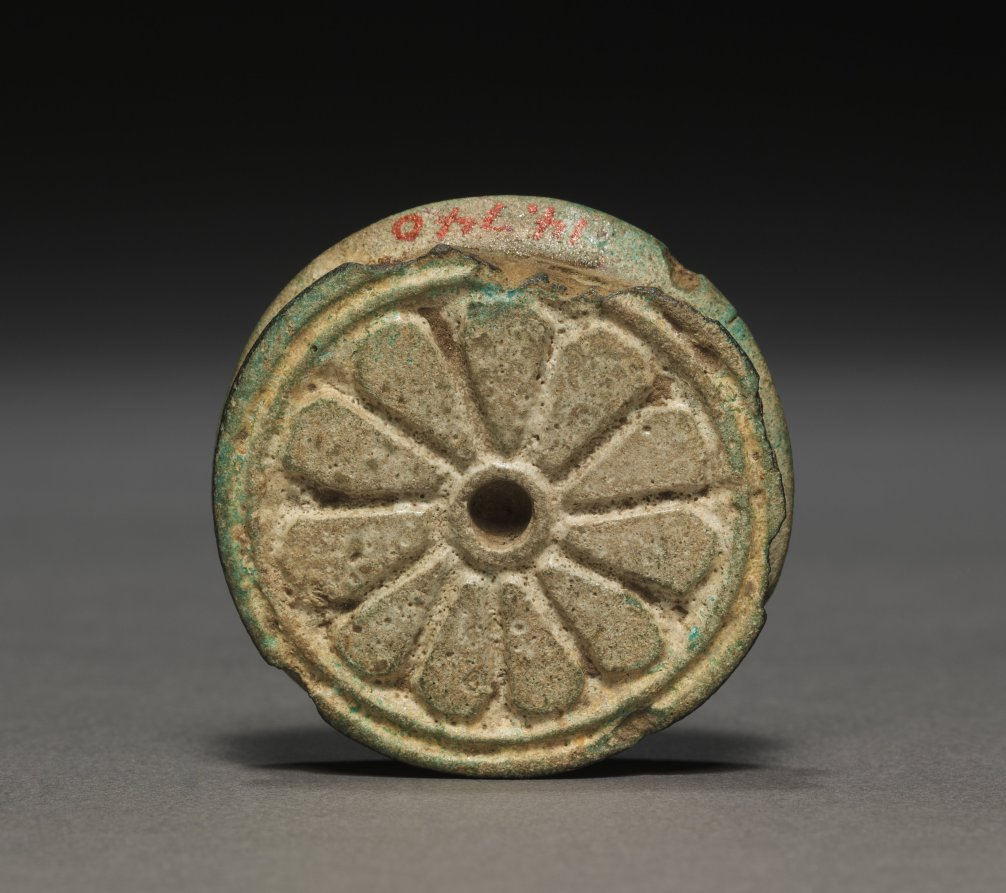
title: Ear Stud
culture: Egypt, New Kingdom (1540–1069 BCE), Dynasty 18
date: 1540–1069 BCE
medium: turquoise faience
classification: Amulets